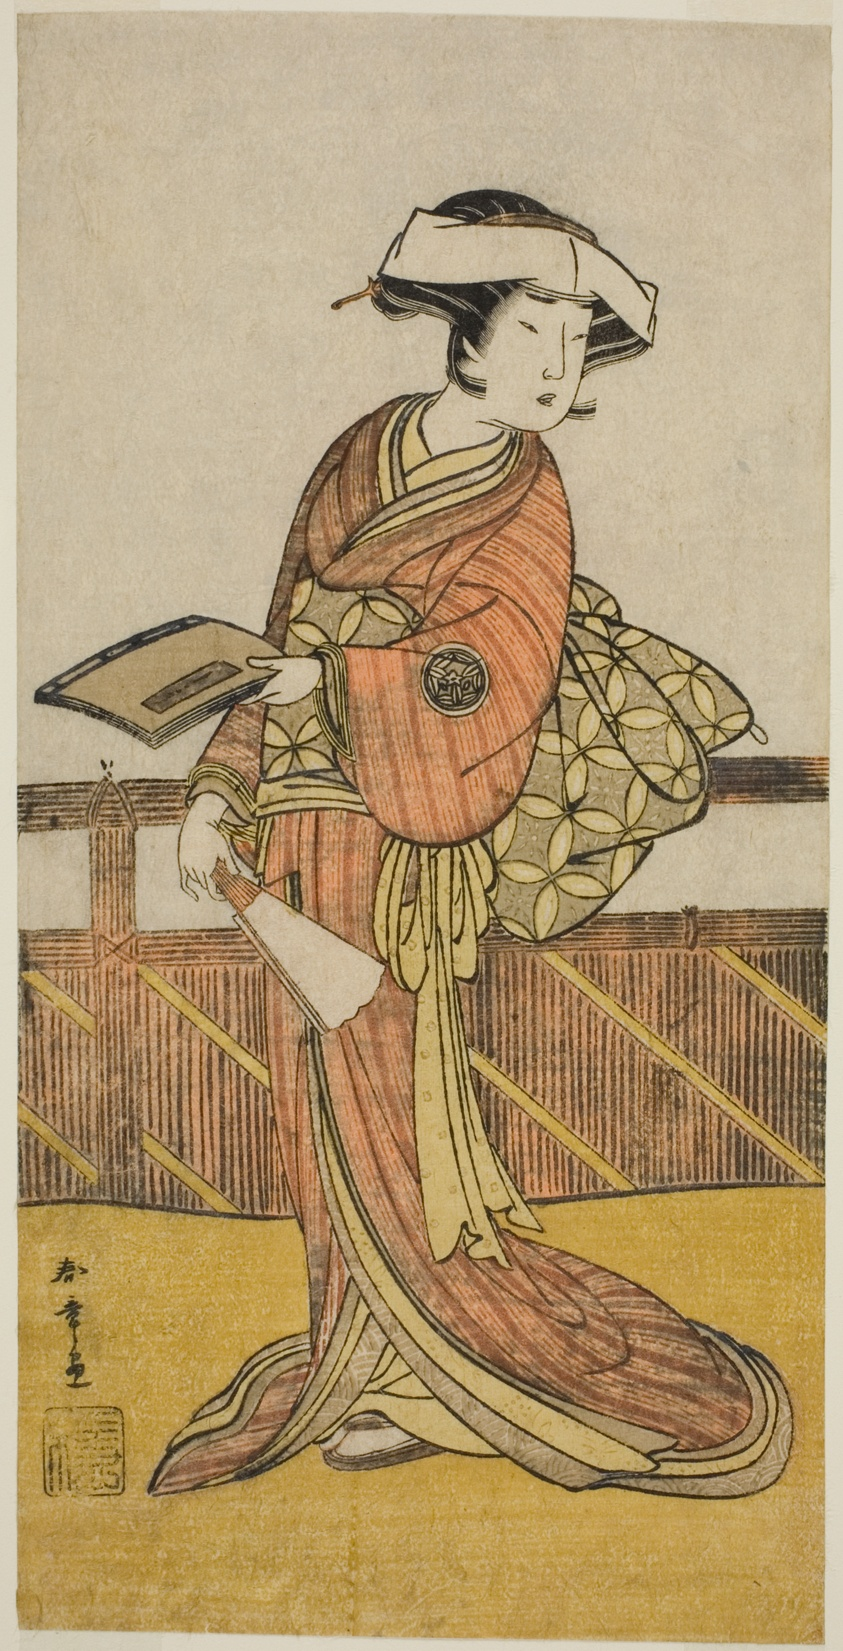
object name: Print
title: The Actor Yamashita Kinsaku II as Oishi (?) in the Play Kanadehon Chushin Nagori no Kura (?), Performed at the Nakamora Theater (?) in the Ninth Month, 1780 (?)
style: Japanese (culture or style)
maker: Katsukawa Shunsho 勝川 春章; Japanese, 1726-1792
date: c. 1780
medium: Color woodblock print; hosoban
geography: Japan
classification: woodblock print; print; asian art